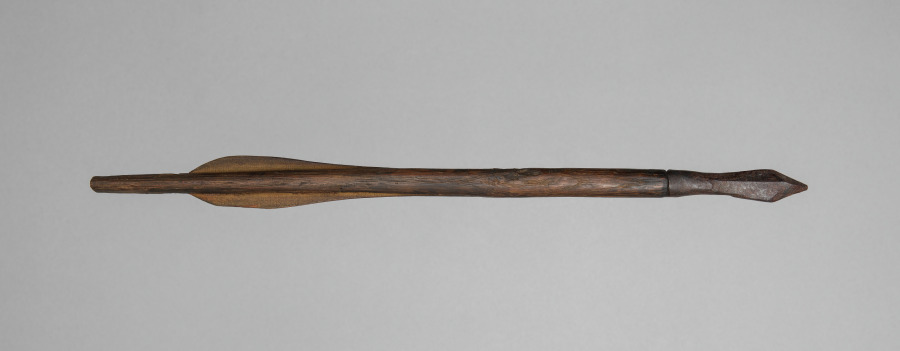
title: Crossbow Bolt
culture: Germany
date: 1500s-1600s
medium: wood, leather, steel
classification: Arms and Armor